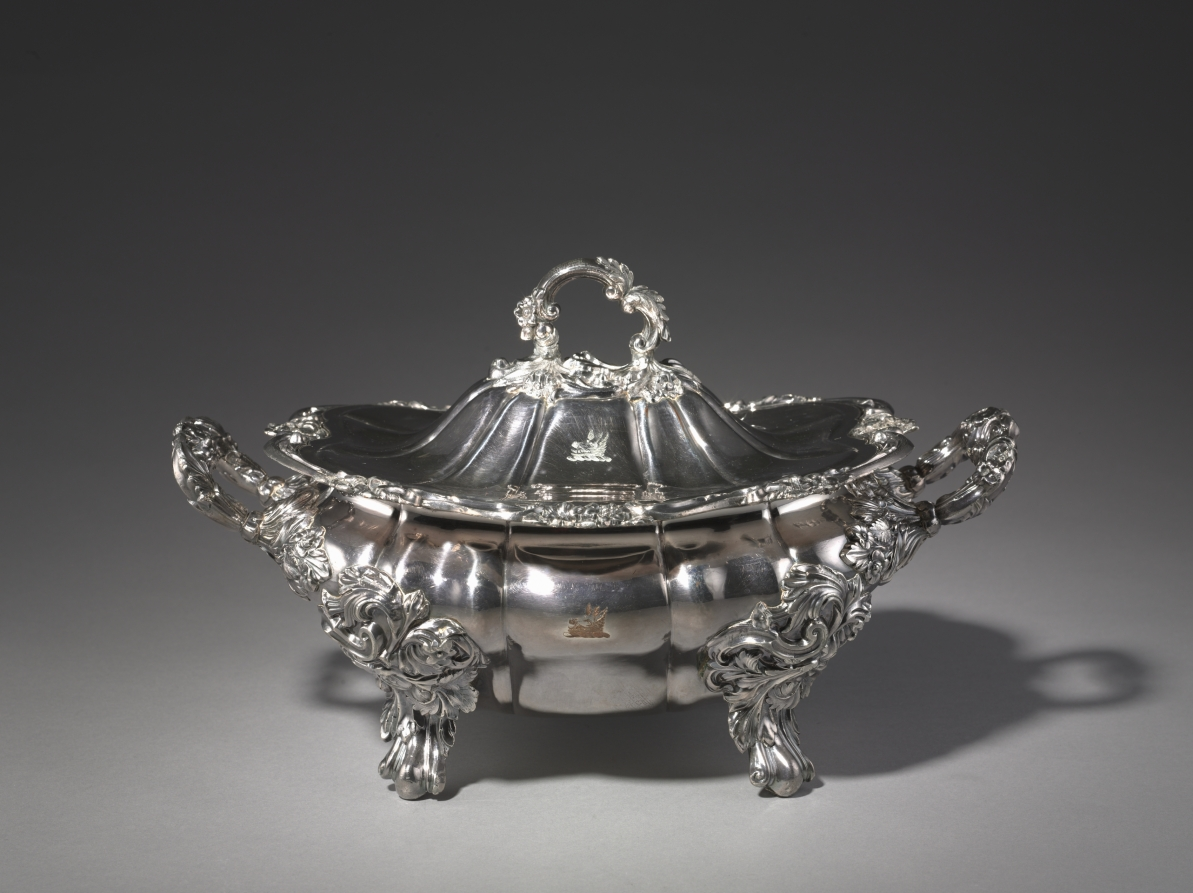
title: Covered Tureen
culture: England, Sheffield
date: c. 1830–50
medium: Silver plated on copper (Old Sheffield Plate)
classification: Silver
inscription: Four boars head crests: Two on either side of the vessel and two on either side of the lid.